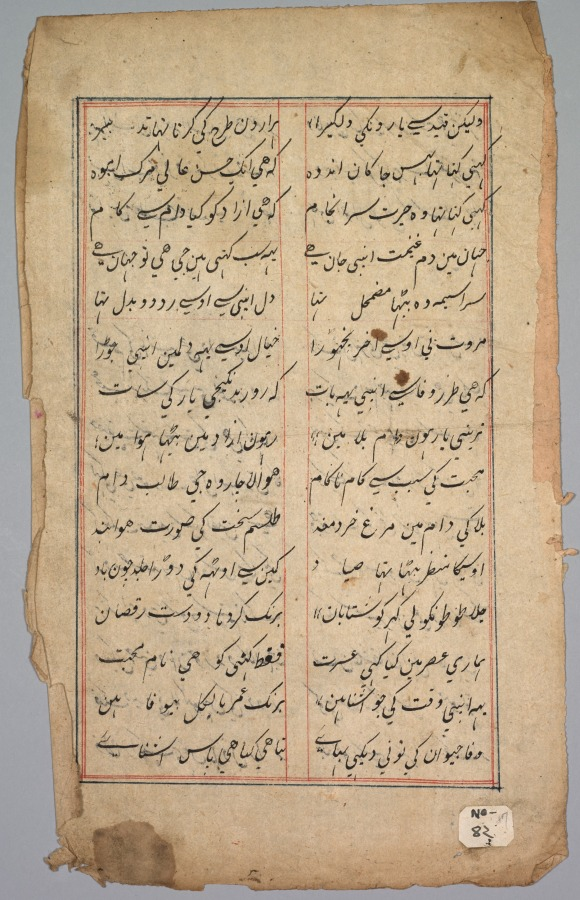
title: Page with Two Columns of Persian Writing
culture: India, Mughal Dynasty (1526-1756)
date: 18th century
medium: ink on paper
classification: Manuscript